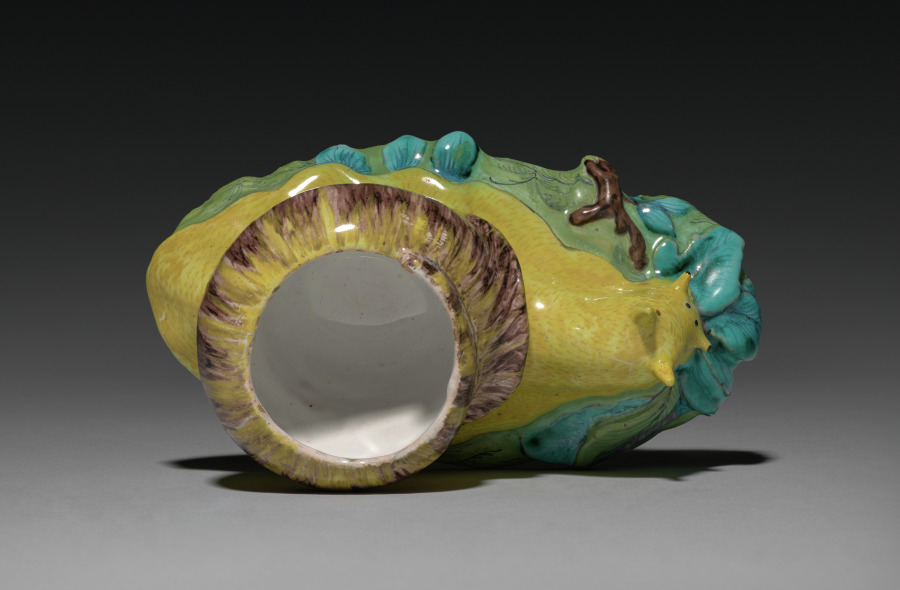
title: Box in the Form of a Snail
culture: France, 18th century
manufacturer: Strasbourg Factory (France)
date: c. 1750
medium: faience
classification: Ceramic